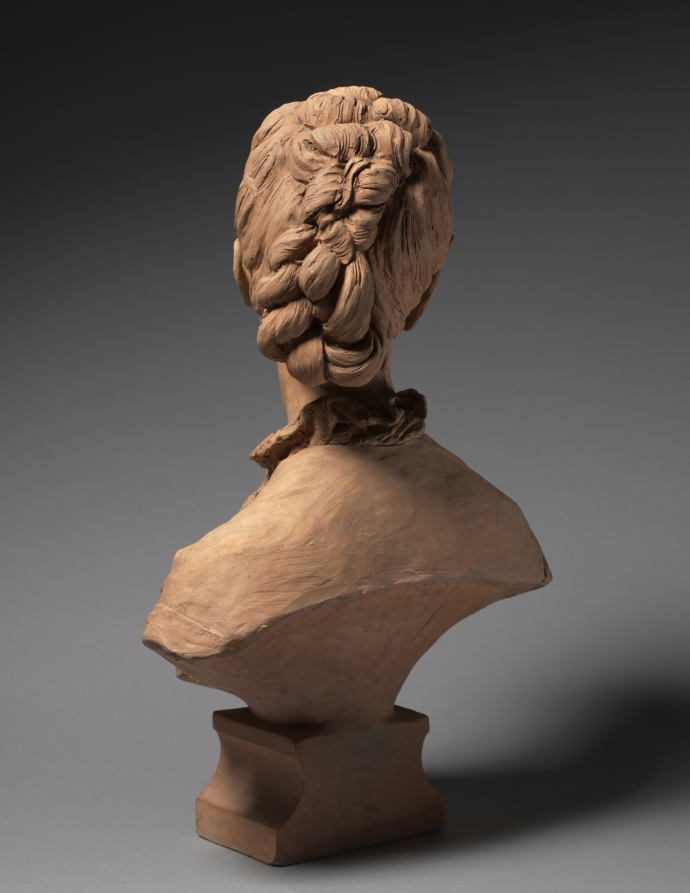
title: Bust of a Lady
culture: France, 19th century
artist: Jules Dalou (French, 1838–1902)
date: c. 1875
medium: terracotta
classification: Sculpture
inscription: Signed beneath right shoulder: "DALOU/1875"